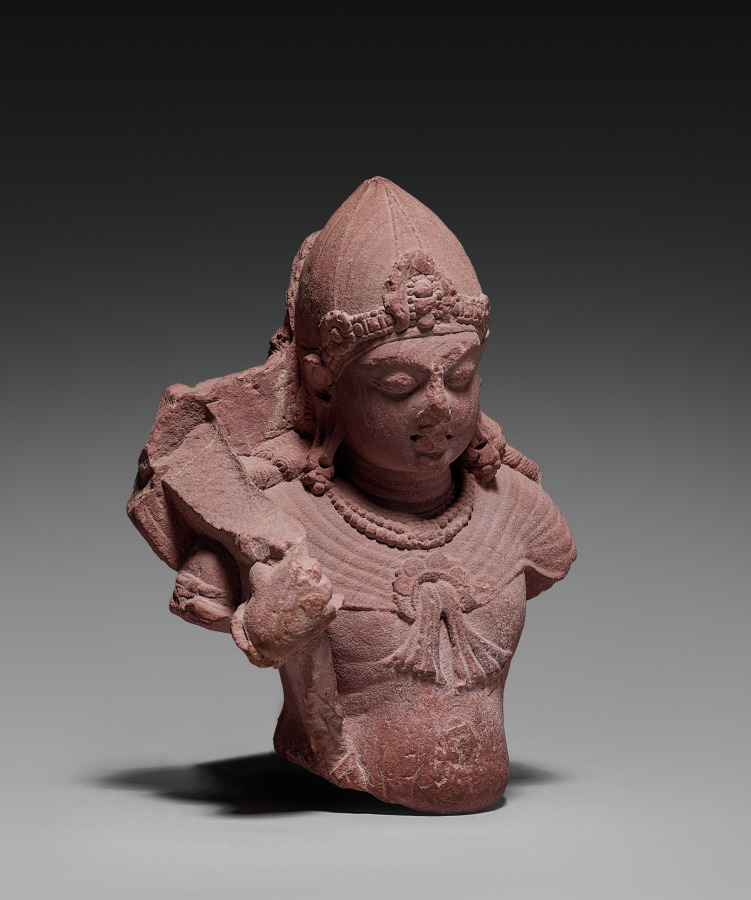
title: Attendant of Surya, the Sun God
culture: India, Mathura, Gupta Period (320-647)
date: 320–650 CE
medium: sandstone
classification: Sculpture